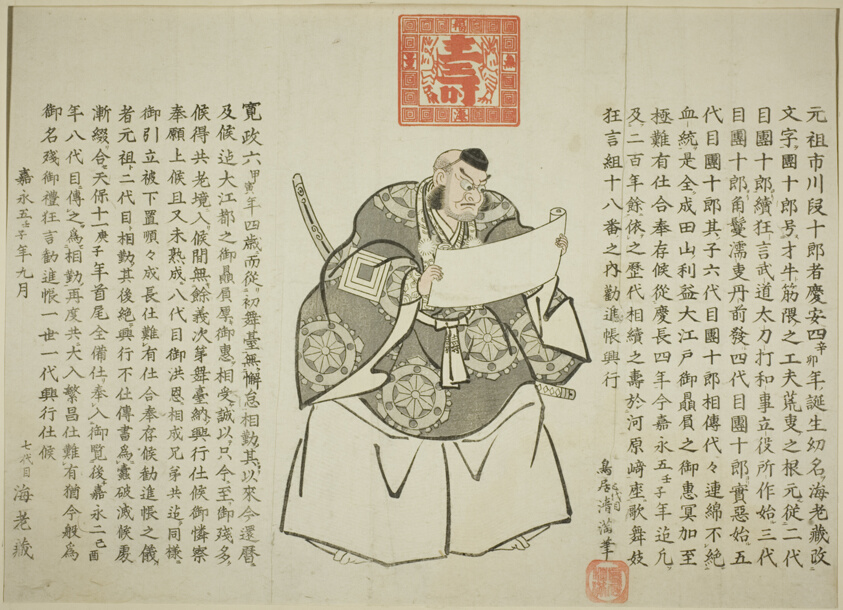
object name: Print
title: Announcement of performance of Kanjincho by Ichikawa Danjuro VIII to celebrate 200 years of Ichikawa family history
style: Japanese (culture or style)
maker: Torii Kiyomitsu II (Kiyomine) (Japanese, 1787–1868)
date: 1852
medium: Color woodblock print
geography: Japan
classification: woodblock print; print; asian art